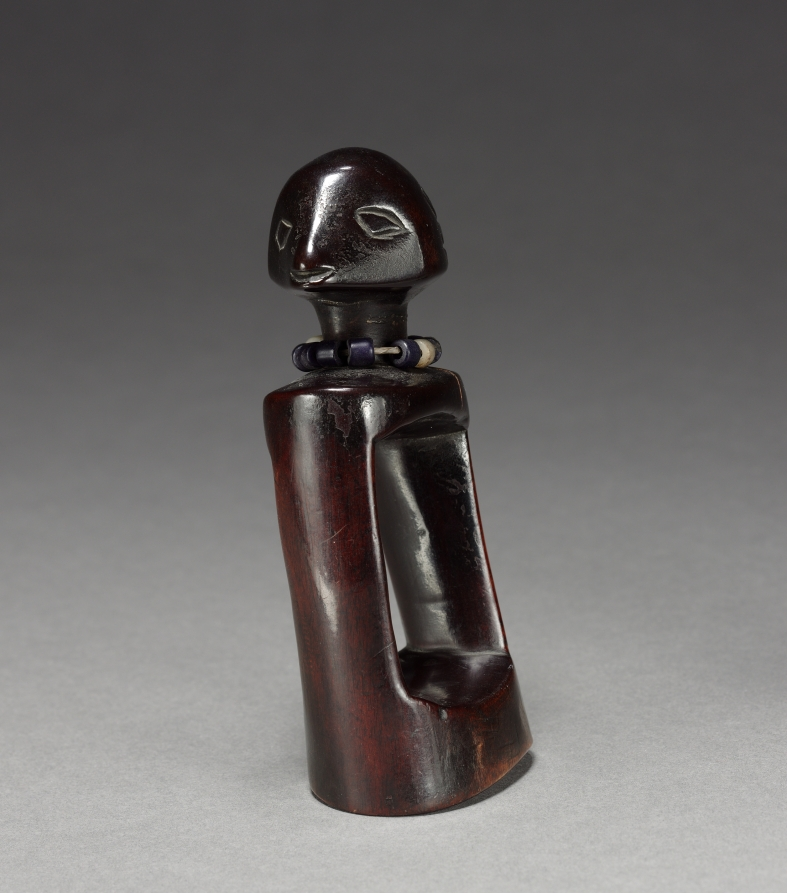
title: Divination Implement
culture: Africa, Central Africa, Democratic Republic of Congo, Luba-style maker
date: late 1800s–early 1900s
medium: Wood, glass beads, and natural fiber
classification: Sculpture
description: This device helped contact an ancestral spirit who clarified misfortunes. The diviner awakened the ancestor by anointing the rectangular frame of the figurine with pungent basil leaves. Sitting on a textured woven mat, the diviner held one side of the instrument while the client held the other. The diviner then posed questions to the ancestor who responded through certain movement signaling affirmation.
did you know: This divination implement is a kakishi (embodiment of an ancestor) device that connects the diviner and the client to the spirit they wish to contact.